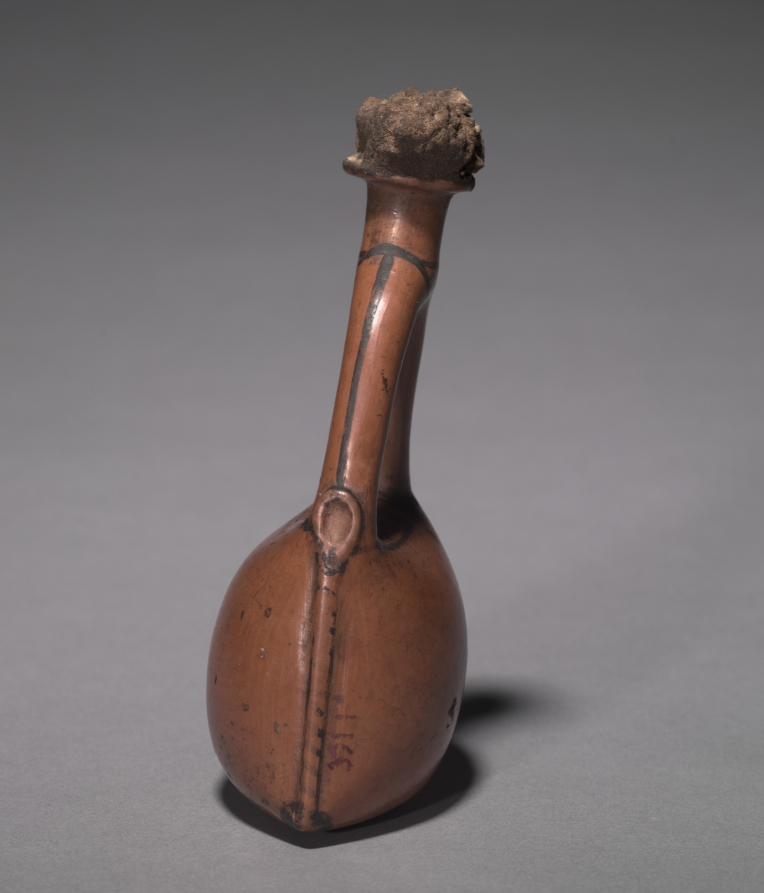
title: Flask in the Form of a Leather Bag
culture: Egypt, New Kingdom (1540–1069 BCE), Dynasty 18, reign of Tuthmosis III (1479–1425 BCE)–reign of Amenhotep III (1390–1352 BCE)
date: c. 1415–1381 BCE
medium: Nile silt ware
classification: Vessels